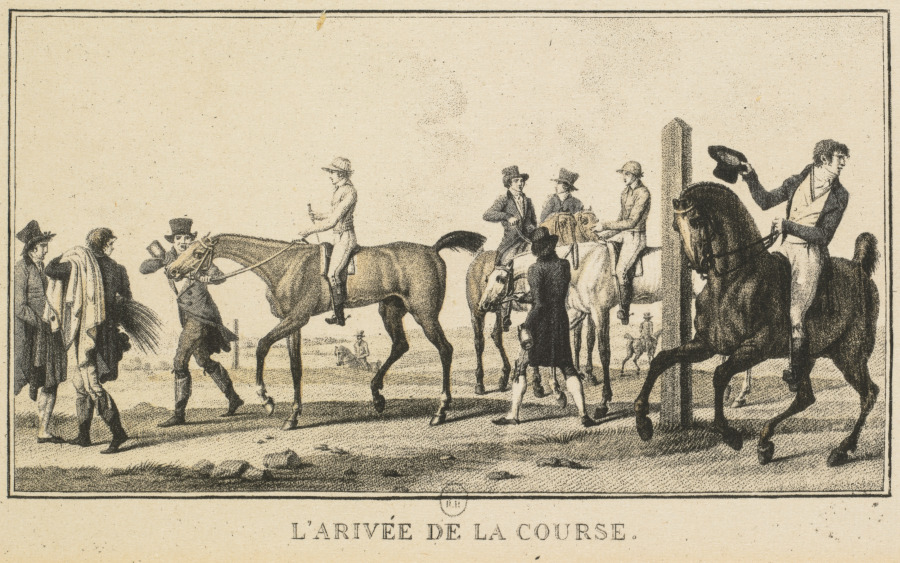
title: Racing Scenes: A Horse Arriving at the Race (Scènes Hippiques: Cheval arrivant de la chasse)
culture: France, 18th-19th century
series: L'Arrivee de la Course, Les Jockeys Montes, La Course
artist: Carle Vernet (French, 1758–1836)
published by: Jazet and Aumont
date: c. 1780–1836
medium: lithograph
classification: Print